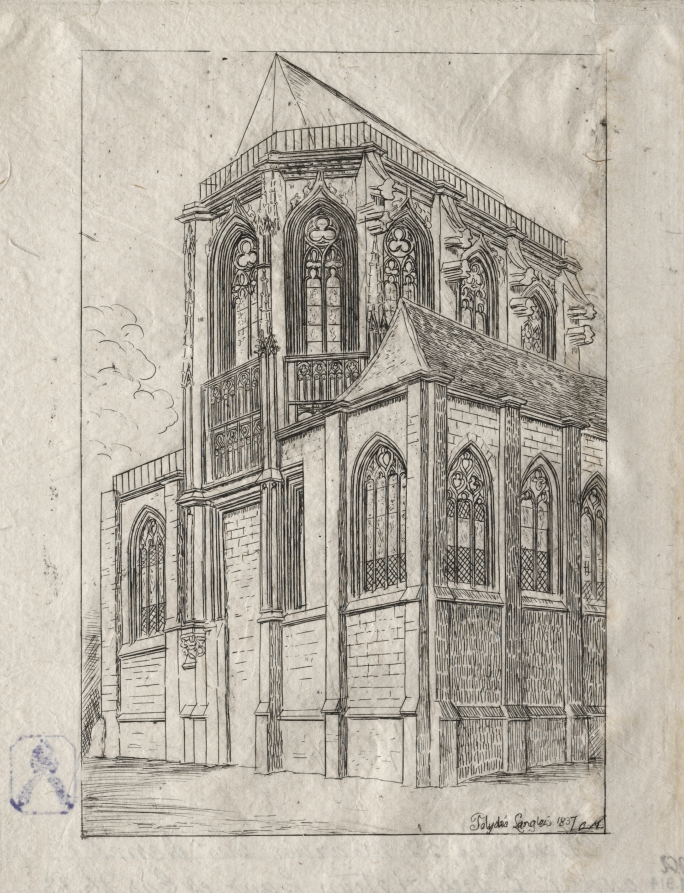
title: The Apse of the Church of St. Martin-sur-Renelle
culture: France, 19th century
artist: Charles Meryon (French, 1821–1868)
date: 1860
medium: etching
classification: Print